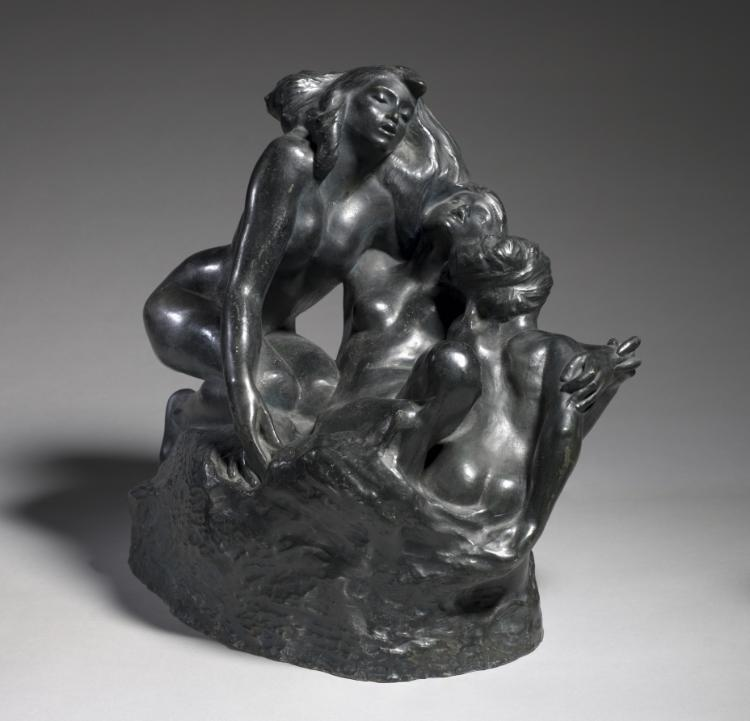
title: The Sirens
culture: France, late 19th-early 20th century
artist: Auguste Rodin (French, 1840–1917)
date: 1889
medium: bronze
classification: Sculpture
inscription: on back: Alexis Rudier/Fondeur 1889, Paris; on inside, separate piece: A. Rodin; on front, left: A. Rodin. Sticker on inside: P. Navez Exposition de Pittsburgh les Syrenes Collection Rodin (du Musée Rodin) No. 131.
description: Rodin intended The Gates of Hell (based on Dante’s The Divine Comedy) to be the great work of his life. It was never executed as originally planned, but Rodin created a number of sculptures for the project that were later treated separately. Among them was this group of three nude women entitled The Sirens.